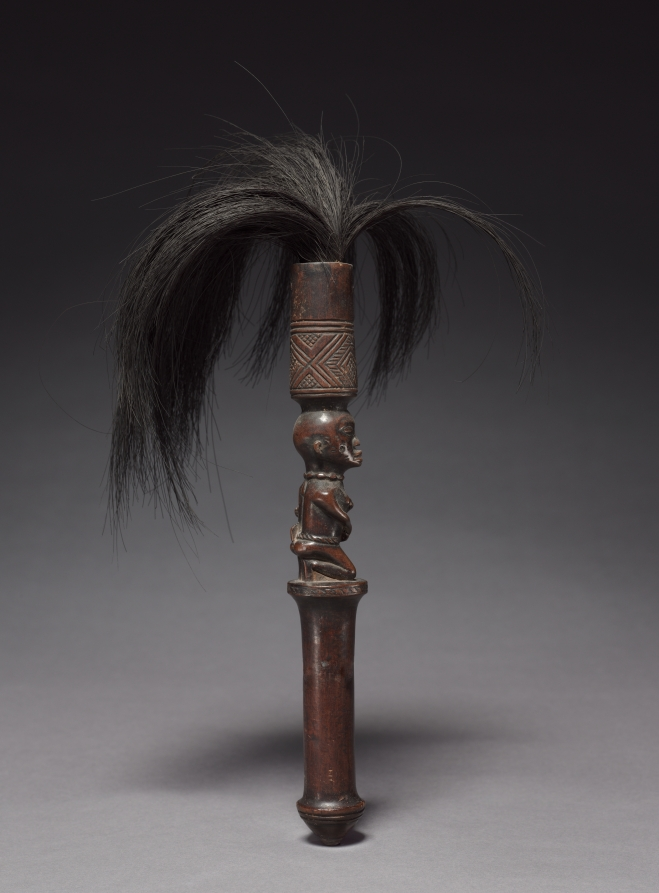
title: Flywhisk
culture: Africa, Central Africa, Democratic Republic of Congo (most likely), Cabinda, or Republic of the Congo, probably Yombe-style maker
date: late 1800s-early 1900s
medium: Wood and animal hair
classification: Sculpture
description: In Central Africa, flywhisks denoted status, rank, and function, rather than used to whisk away flies. Commonly associated with chiefs and titleholders, they were also owned by diviners and healers. Their purpose may also have been used to purify spaces, bless people, places, or things, and settle disputes. Flywhisks rarely depict women; yet this finely carved miniature of a woman kneeling signifies obedience and respect.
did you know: Rarely do flywhisks depict a female figure.